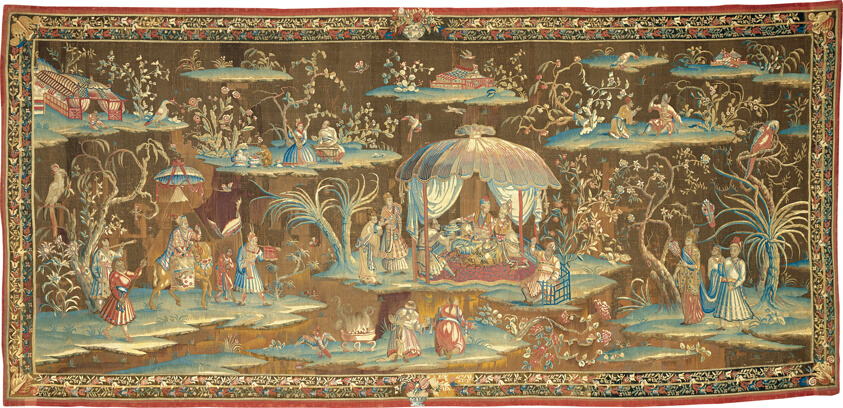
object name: Textile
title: The Tent, from an Indo-Chinese or Indian Series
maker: Woven at the workshop of John Vanderbank (died 1717), Michael Mazarind, or Leonard Chabaneix (died 1708/09); England, London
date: 1700/25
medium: Wool and silk, slit and double interlocking tapestry weave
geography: England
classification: weaving - tapestry; textile